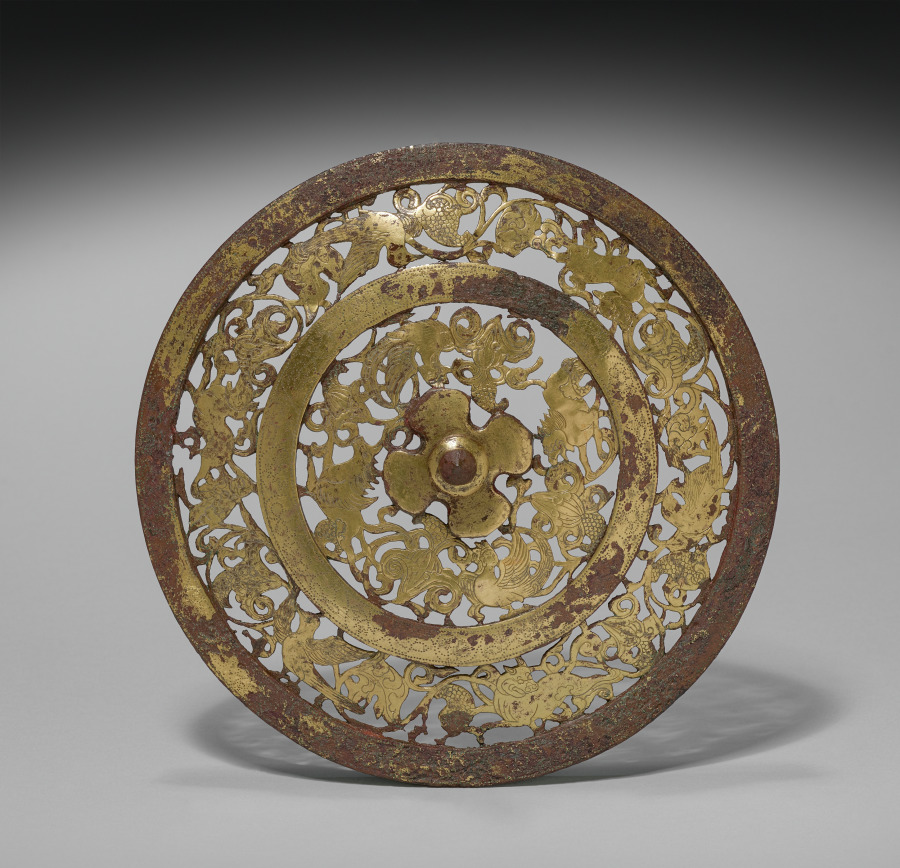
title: Cylindrical Container with Cover (Lian)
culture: China, Han dynasty (202 BCE–220 CE)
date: 100 BCE–100 CE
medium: gilt bronze with openwork and chased designs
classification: Metalwork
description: This magnificent gilded bronze vessel with openwork decoration shows all kinds of fabulous creatures, real and imaginary, chasing each other among swirling scrolls. There is an emphasis on the unbroken rhythms of movement, rather than the ferocity of animals in combat. Cylindrical bronze vessels in this shape, called lian, were often used as cosmetic boxes.